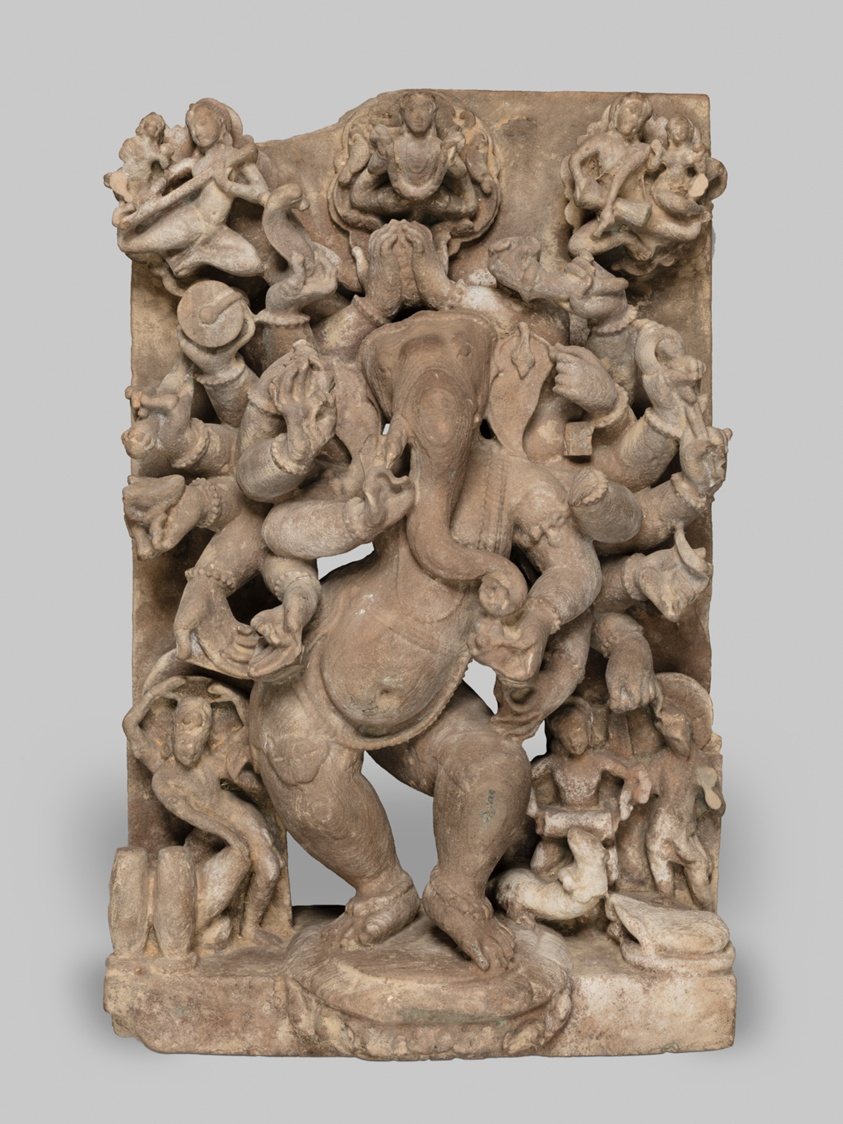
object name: Sculpture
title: Twenty-Armed Dancing God Ganesha, Remover of Obstacles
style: South Asian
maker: India; Madhya Pradesh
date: 10th century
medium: Sandstone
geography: Madhya Pradesh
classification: sandstone; stone; sculpture; asian art